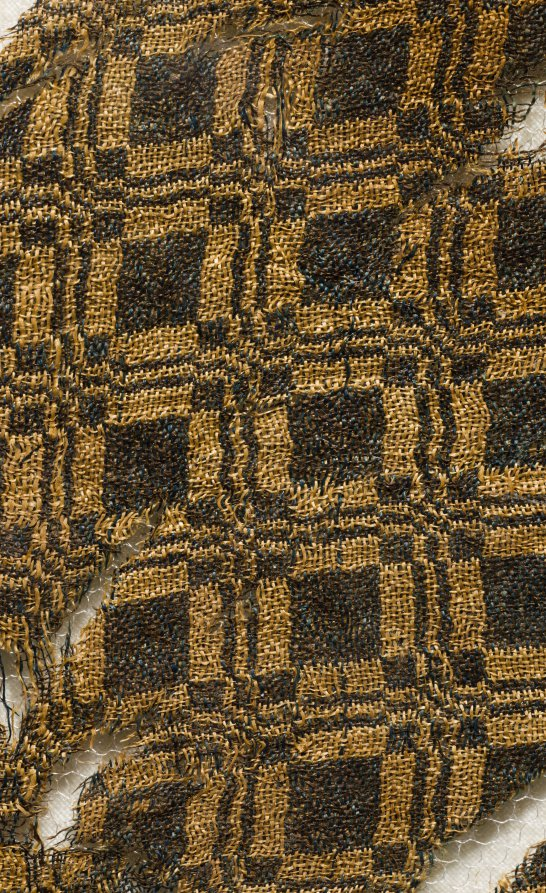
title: Silk Fragment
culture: Egypt, Mamluk sultanate (1250–1517)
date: 1300s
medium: tabby weave; silk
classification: Textile